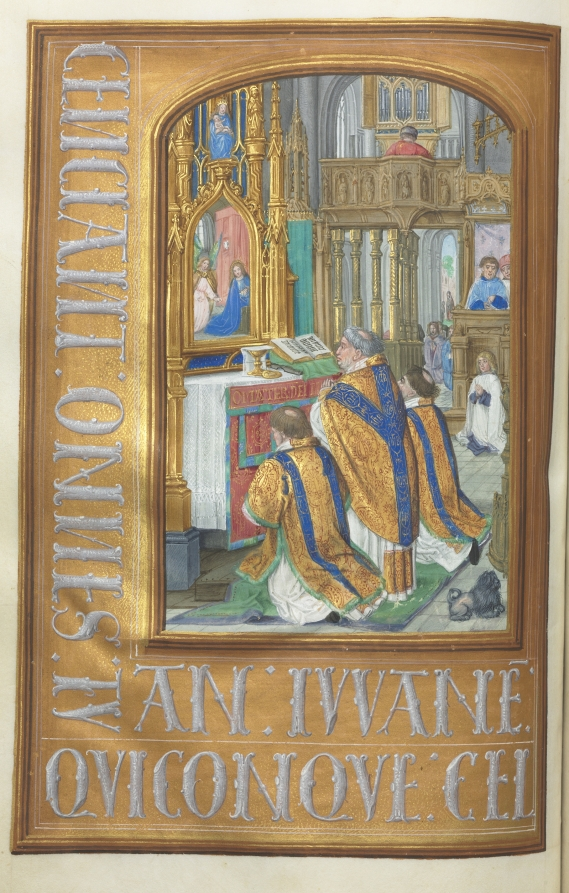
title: Hours of Queen Isabella the Catholic, Queen of Spain: Fol. 87v, Celebration of the Mass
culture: Flanders, Ghent and Bruges, late 15th century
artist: Master of the First Prayerbook of Maximillian (Flemish, c. 1444–1519)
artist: and Associates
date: c. 1500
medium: ink, tempera, and gold on vellum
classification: Bound Volume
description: This manuscript was illuminated by a circle of at least five highly organized manuscript painters active in the Flemish cities of Ghent and Bruges. The principal illuminator was Alexander Bening, who painted the majority of the book's miniatures. Manuscripts produced by this circle of artists are renowned for the decoration of their borders, which typically feature a rich variety of realistically-painted flowers, birds, and butterflies. This prayer book, called a book of hours, was intended not for a cleric, but for the private devotions of a lay person-in this case, Isabella the Catholic, Queen of Spain (1451-1504). Isabella's coat of arms embellishes the book's frontispiece. It is unlikely that the book was commissioned by the Queen herself; rather, she probably received it as a diplomatic gift from someone courting her patronage, perhaps Cardinal Francisco Jimenez de Cisneros. A Franciscan friar, Jimenez was dependent upon Isabella for his advancement, first to the post of Queen's confessor in 1492, and then to Archbishop of Toledo in 1495.